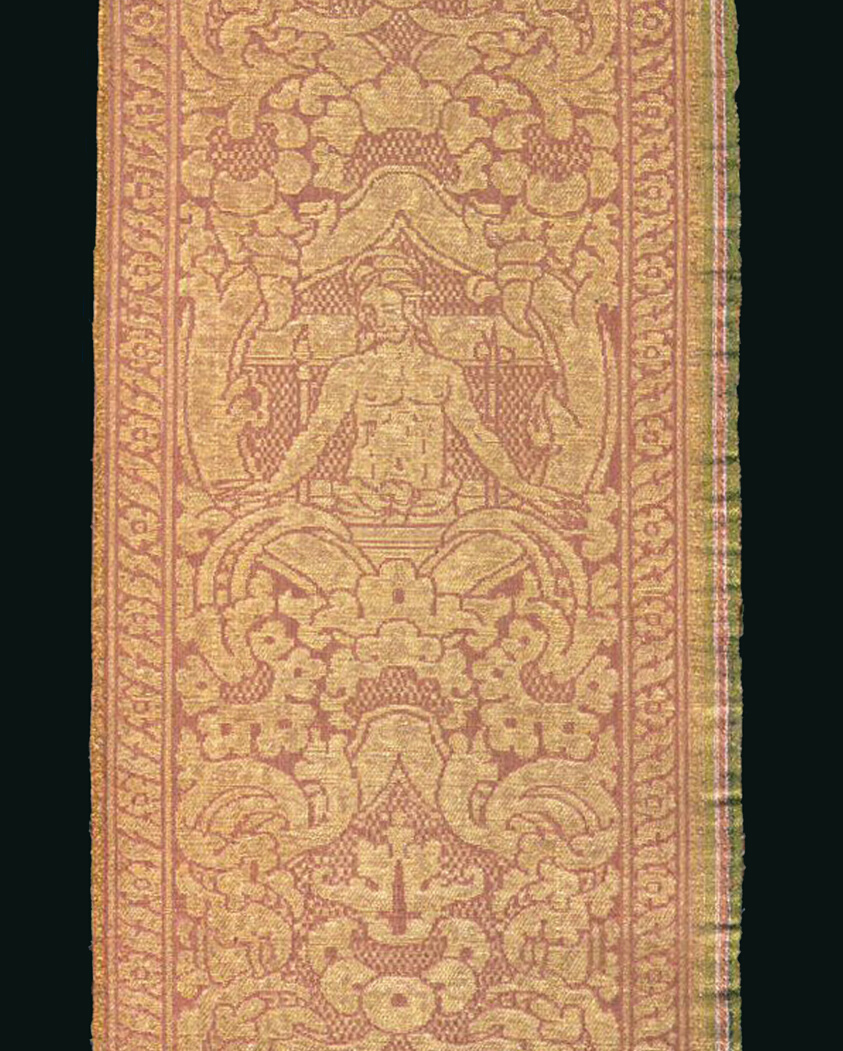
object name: Textile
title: Orphrey Band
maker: Italy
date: 15th/16th century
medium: Linen, silk, gold wire, integrated compound-weave of warp-float faced satin weave and warp-float faced twill weave with supplementary patterning wefts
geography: Italy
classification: textile; weaving; liturgical